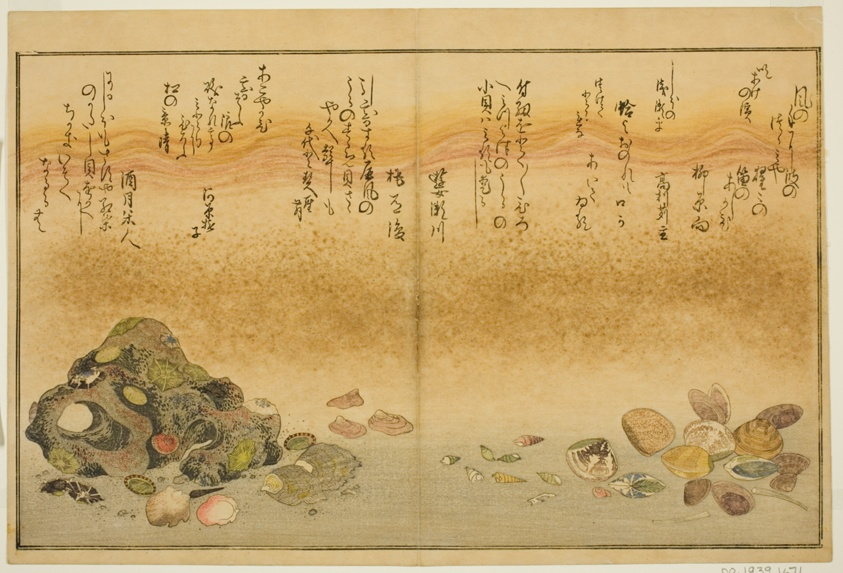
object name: Print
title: Ashi-gai, hamaguri, ko-gai, suzume-gai, akoya-gai, and katashi-gai, from the illustrated book "Gifts from the Ebb Tide (Shiohi no tsuto)"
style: Japanese (culture or style)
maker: Kitagawa Utamaro 喜多川 歌麿; Japanese, 1753 (?)-1806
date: 1789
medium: Color woodblock print; double-page illustration from book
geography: Japan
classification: woodblock print; print; asian art